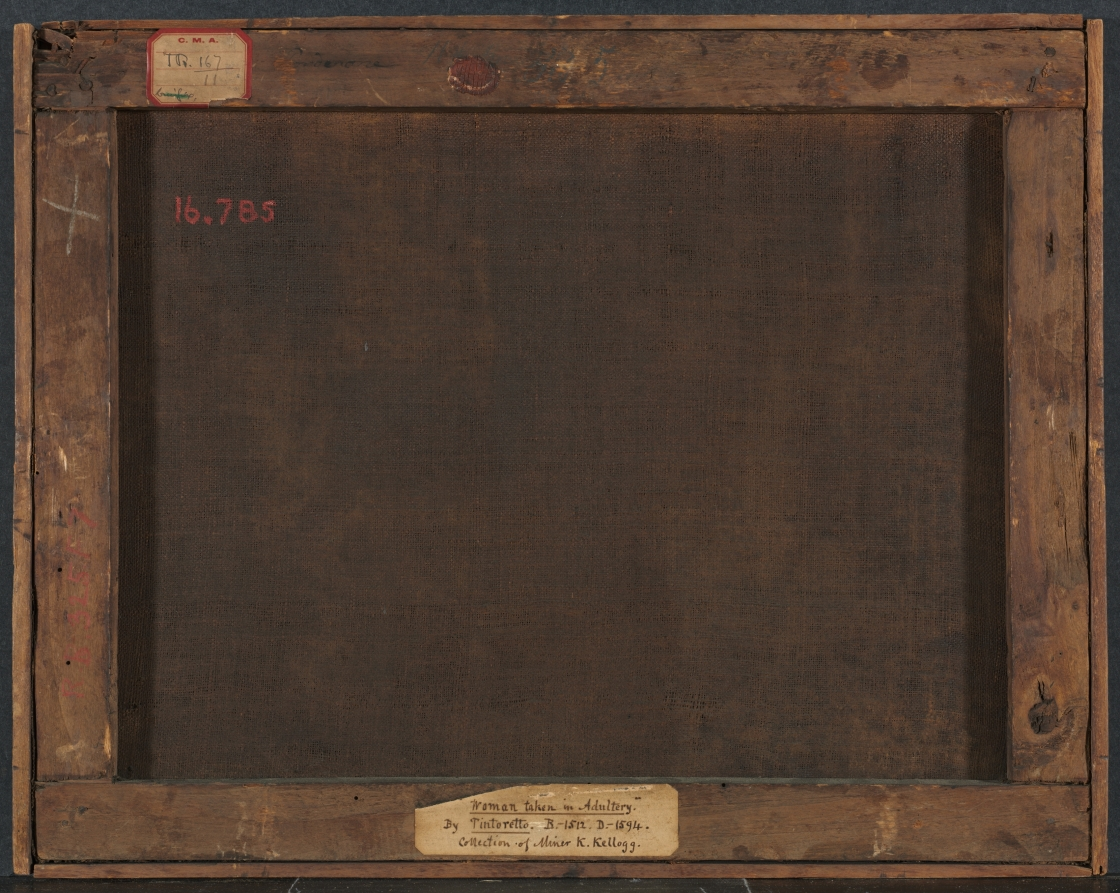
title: Christ and the Woman Taken in Adultery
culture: Italy, 18th century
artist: follower of Sebastiano Ricci (Italian, 1659–1734)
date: mid 1700s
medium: oil on canvas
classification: Painting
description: The subject originates in the Gospel of John 7:53-8:11, where Pharisees bring a woman accused of adultery to Christ, attempting to trick him into disobeying the Old Testament precept that she be stoned. In response, Christ interrupted his writing on the ground, stating: "Let anyone among you who is without sin be the first to throw a stone at her." The Pharisees, unable to retort, gradually disperse, and Christ eventually sends the woman away with an admonition not to sin again. The subject was popular in 18th-century Venice, partly because magnanimity was an important value, celebrated in visual, musical, and literary culture. The showy, exotic subject and the public presentation of an openly sexualized woman also enjoyed popularity in 18th-century Venetian painting. This work is a copy of the picture at the Minneapolis Institute of Arts, perhaps by a student (and certainly not by Ricci himself)